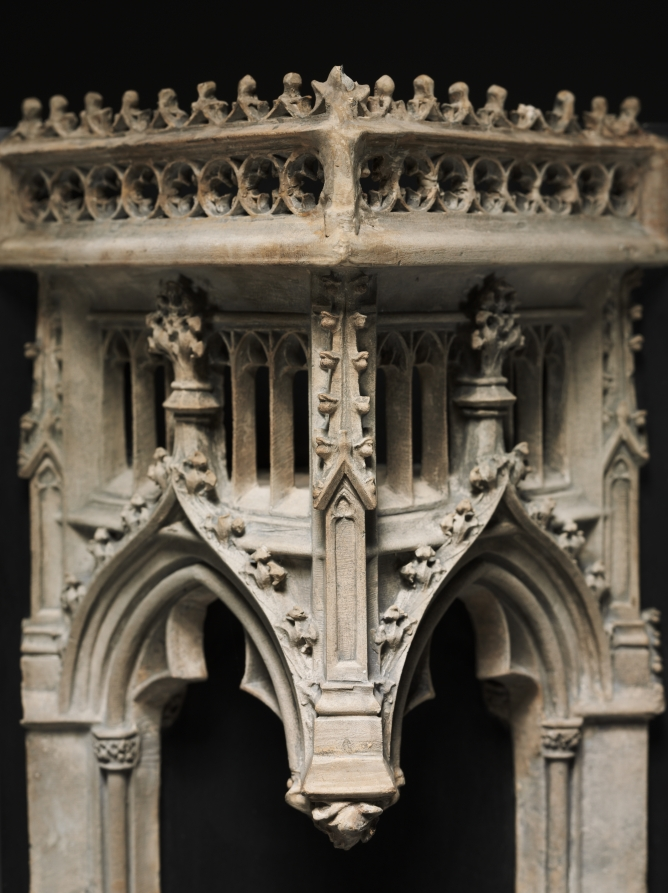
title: Architectural Canopy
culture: France, Burgundy, 15th century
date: c. 1450–1475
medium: limestone from Tonnerre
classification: Sculpture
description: Part of a pair of canopies, both must have originally belonged to an architectural ensemble like a tomb or a choir screen set within a church. Strikingly carved as architecture in miniature, they contain all of the elements of Flamboyant Gothic architecture of the late 15th century, so named after its flame-like stone tracery with wavy ornaments. This style of architecture is characterized by its intricacy of detailing and virtuosity of workmanship. Small sculptures may have originally occupied the space beneath the canopies.